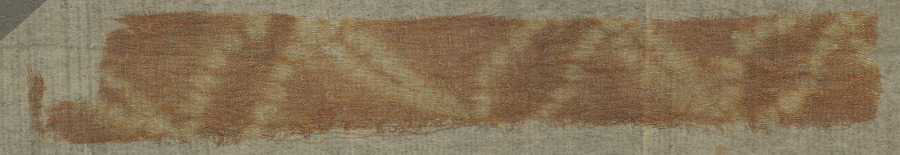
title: Fragment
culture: China or Japan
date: 700s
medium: plain cloth, resist printed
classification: Textile